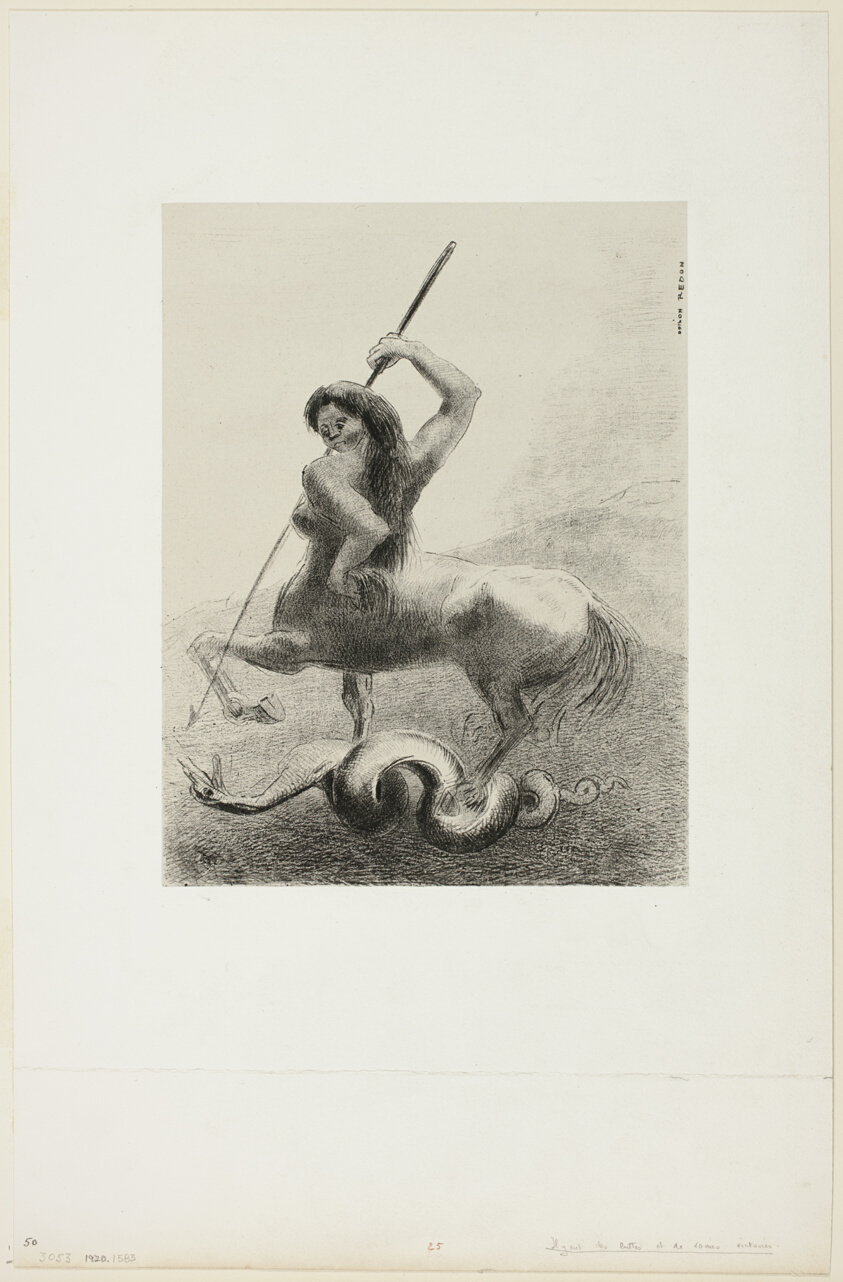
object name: Print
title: There Were Struggles and Vain Victories, plate 6 of 8 from "Les Origines"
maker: Odilon Redon (French, 1840-1916)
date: 1883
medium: Lithograph in black on light gray China paper, laid down on white wove paper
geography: France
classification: lithograph; print; prints and drawing; paper